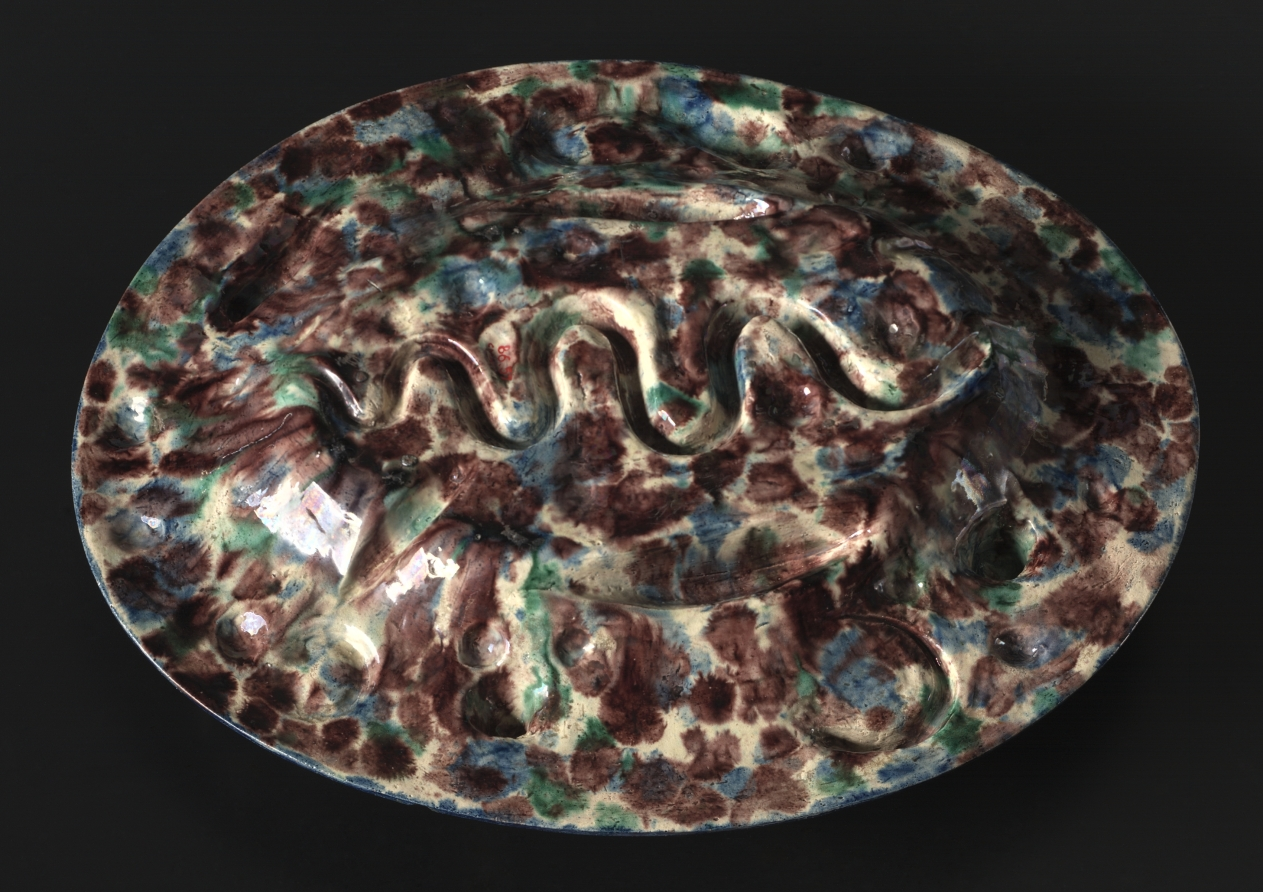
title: Platter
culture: France, 16th century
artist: circle of Bernard Palissy (French, 1510–1589)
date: late 1500s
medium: lead-glazed earthenware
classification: Ceramic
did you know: Coiled snakes, slinking lizards, and scaly fish adorn this decorative platter. Some of the naturalistic details were formed using casts of real animals.